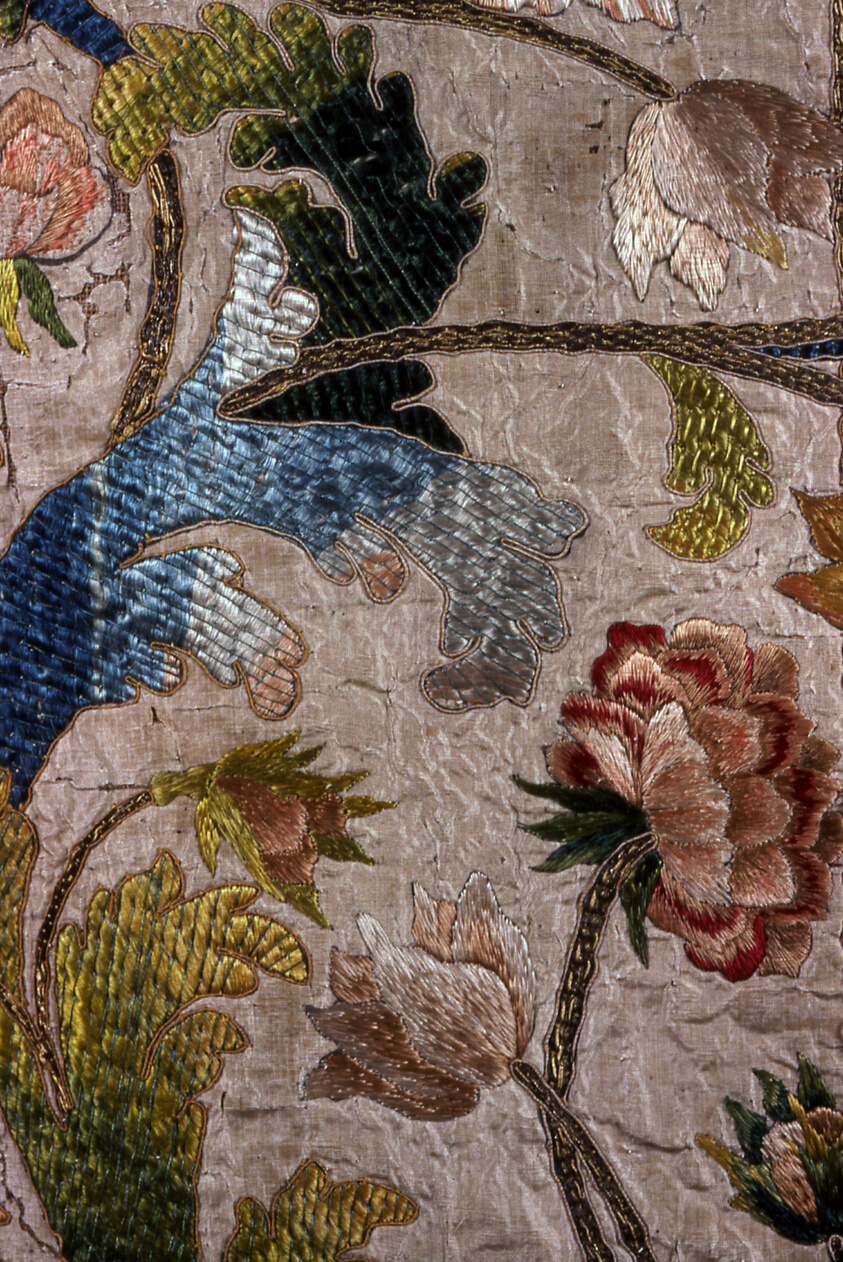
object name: Costume and Accessories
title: Chasuble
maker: Italy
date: 18th century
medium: Silk, plain weave; embroidered with silk floss, silk-wrapped linen, and gilt-metal-strip-wrapped silk in satin stitch; couching; edged with silk, bobbin-made tape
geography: Italy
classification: textile; costume; chasuble; needlework (visual works); liturgical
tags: flowers, yellow (color), tulips, scrolls (motifs), pink (color), peonies, lilies, green (color), foliage, crosses, blue (color)